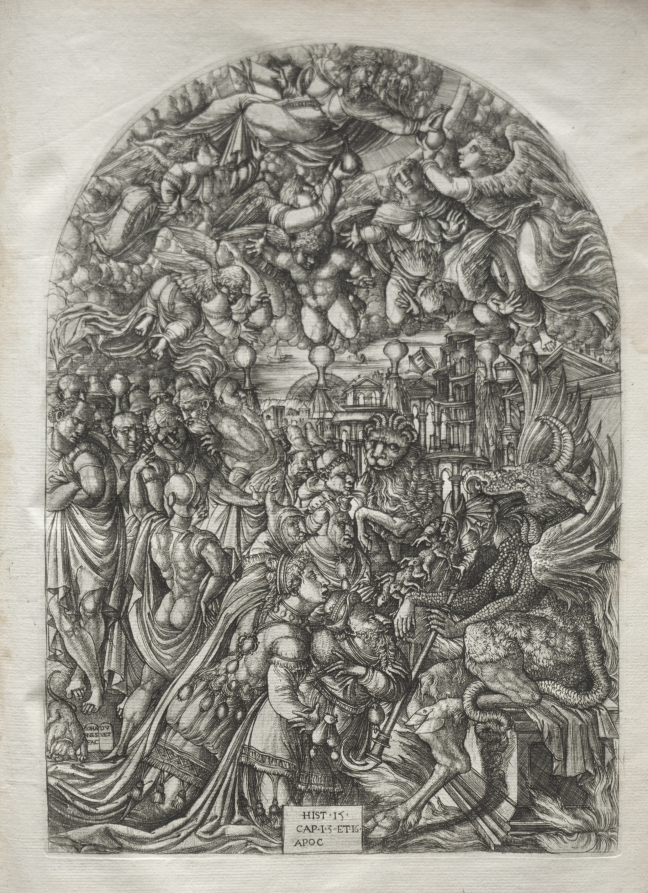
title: The Apocalypse: The Woman Clothed with the Sun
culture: France, 16th century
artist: Jean Duvet (French, 1485–1561)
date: 1546–1556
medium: engraving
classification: Print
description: This print is part of a bound volume of works illustrating the a narrative of the Apocalypse, taken from the Revelation of Saint John in the Bible. The 23 engravings in the series occupied the artist for a number of years and represent his greatest artistic achievement. The museum's volume is one of only seven known complete sets. Jean Duvet was one of the first major printmakers in France and one of the most original artists of the 1500s. Although he worked mostly in the provincial city of Langres, he became aware of Italian art through the circulation of prints—notably those of Marcantonio Raimondi. His solidly modeled human figures reflect the influence of the Italian High Renaissance. Duvet, however, developed an idiosyncratic, highly artificial style with crowded compositions that ignore rational space in favor of ornamental surface patterns.